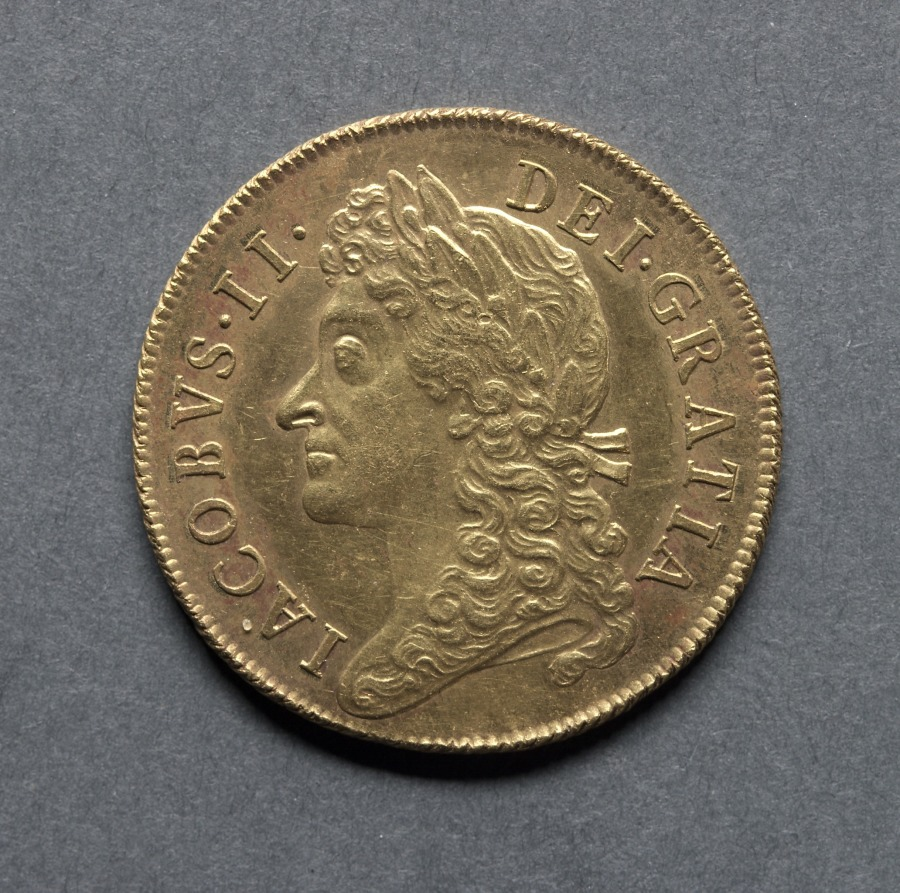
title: Two Guineas: James II (obverse); Four Shields of Arms (reverse)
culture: England, James II, 1685-1688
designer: John Roettier (British, 1631–1703)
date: 1687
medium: gold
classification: Coins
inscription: DEI GRATIA IACOEVS II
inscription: MAG BR FRA ET HIB REX 1687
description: The coin type of James II was a continuation of that of the reign of his brother, Charles II. A rare piece, this denomination was only issued in 1687 and 1688. The four gold denominations established under the reformed coinage of the previous reign were five guineas, two guineas, guinea, and half guinea.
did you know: The shields are as follows: England has three lions, Scotland has one lion, France has three fleur-de-lis, and Ireland has a harp.